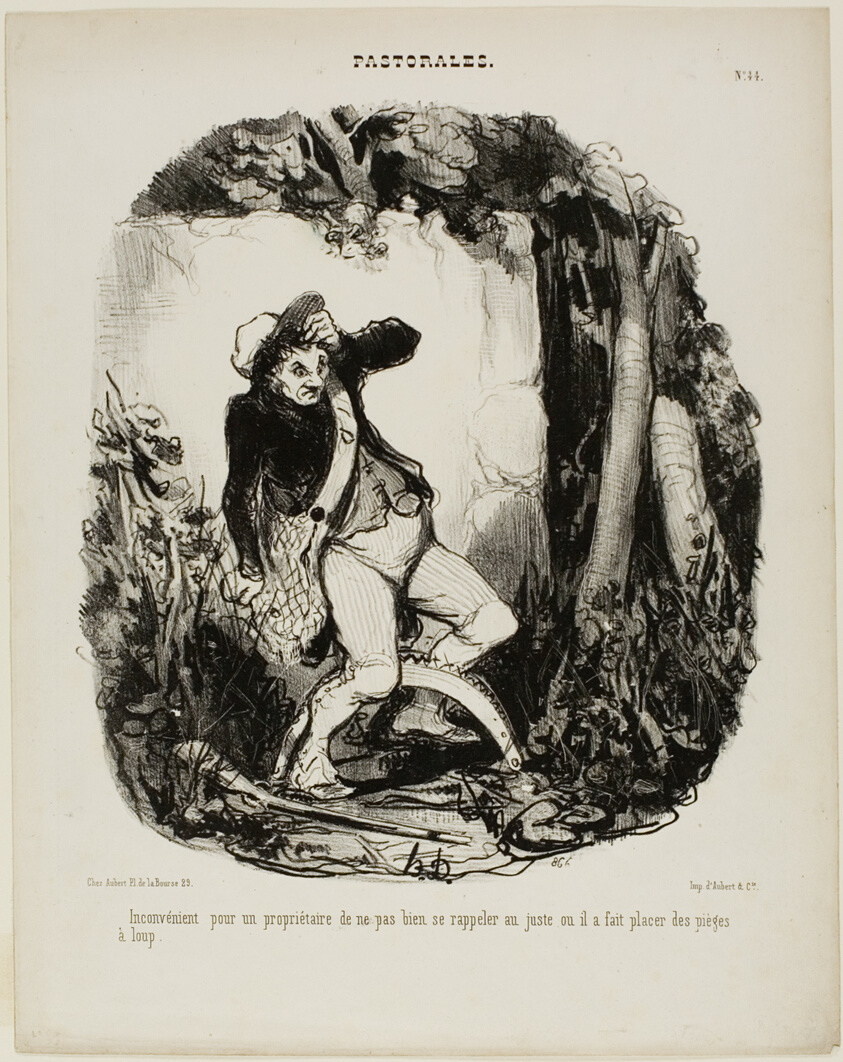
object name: Print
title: Quite embarrassing not to remember where one has hidden the wolf traps, plate 44 from Pastorales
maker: Honoré Victorin Daumier; French, 1808-1879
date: 1846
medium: Lithograph in black on white wove paper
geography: France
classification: lithograph; print; prints and drawing